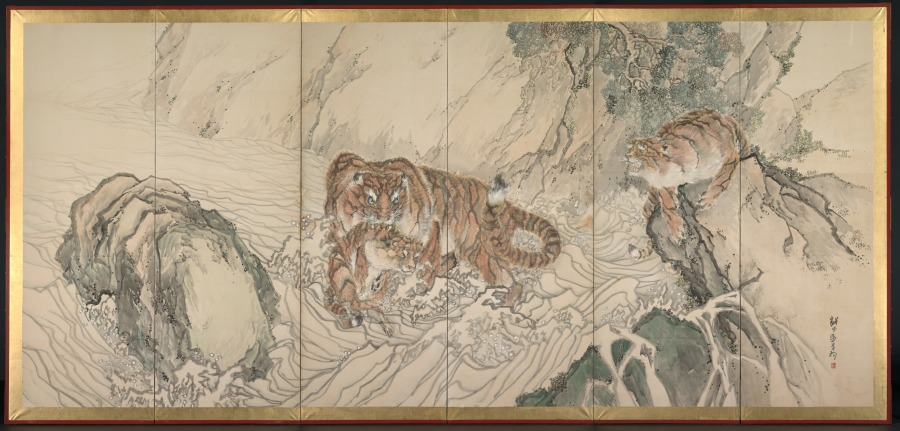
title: Tiger Family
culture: Japan, Edo period (1615–1868)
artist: Kishi Ganku (Japanese, 1749/56–1838)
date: early 1800s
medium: One of a pair of six-panel folding screens; ink and color on paper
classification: Painting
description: By the time this self-taught painter reached his thirties, his paintings were keenly sought after by Kyoto’s sophisticated patrons, including members of the imperial family. Judging from the surviving works, his supporters delighted in the colorful, auspicious imagery of Chinese historical figures, blossoming plum trees, cranes, peacocks, roosters, and especially tigers. Kishi Ganku was originally from the coastal town of Kanazawa, but relocated to Kyoto to work for the Arisugawa family. His work incorporates stylistic elements from the Kano school, the Maruyama school, and works by the Chinese artist Shen Nanping (1682–1760).